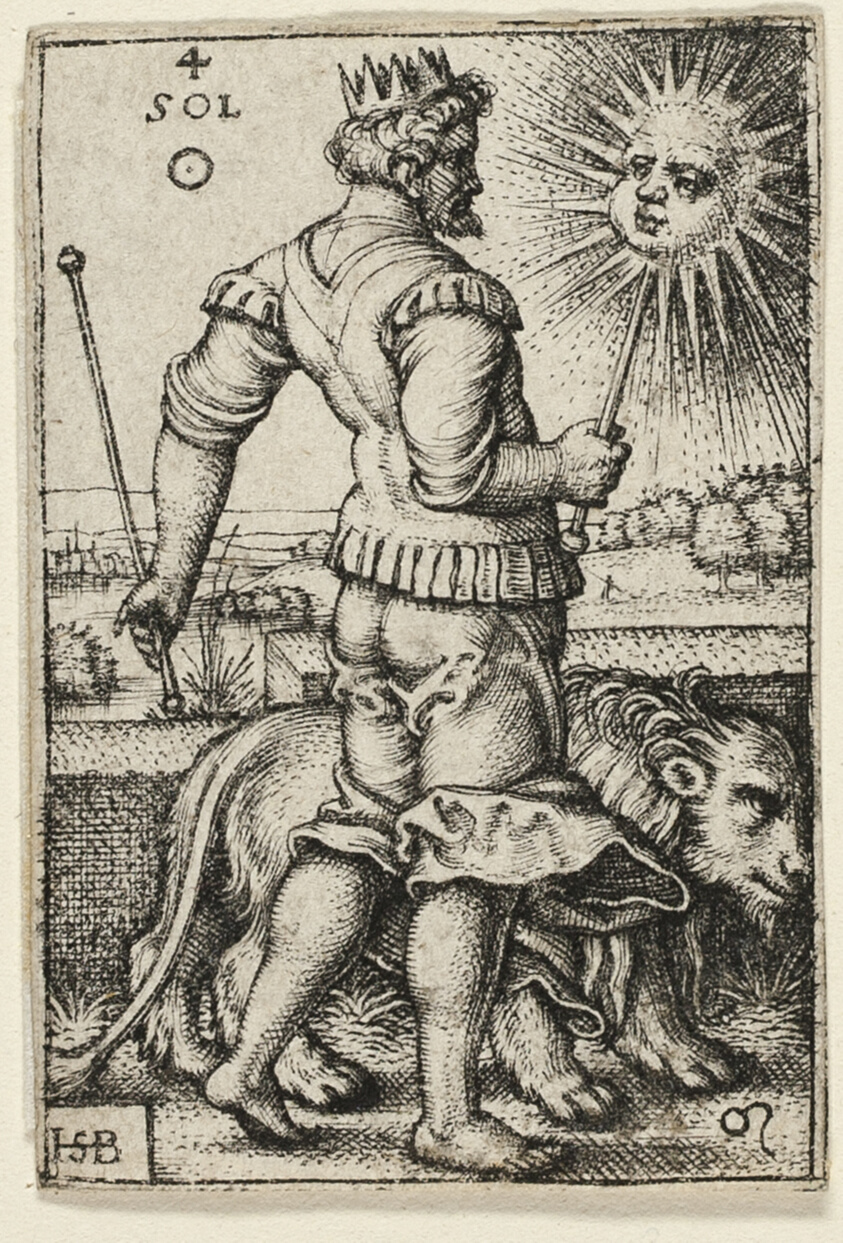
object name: Print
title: Sun, plate four from The Seven Planets with the Zodiacs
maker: Sebald Beham; German, 1500-1550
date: 1539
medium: Engraving in black on ivory wove paper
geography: Germany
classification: engraving; prints and drawing; print